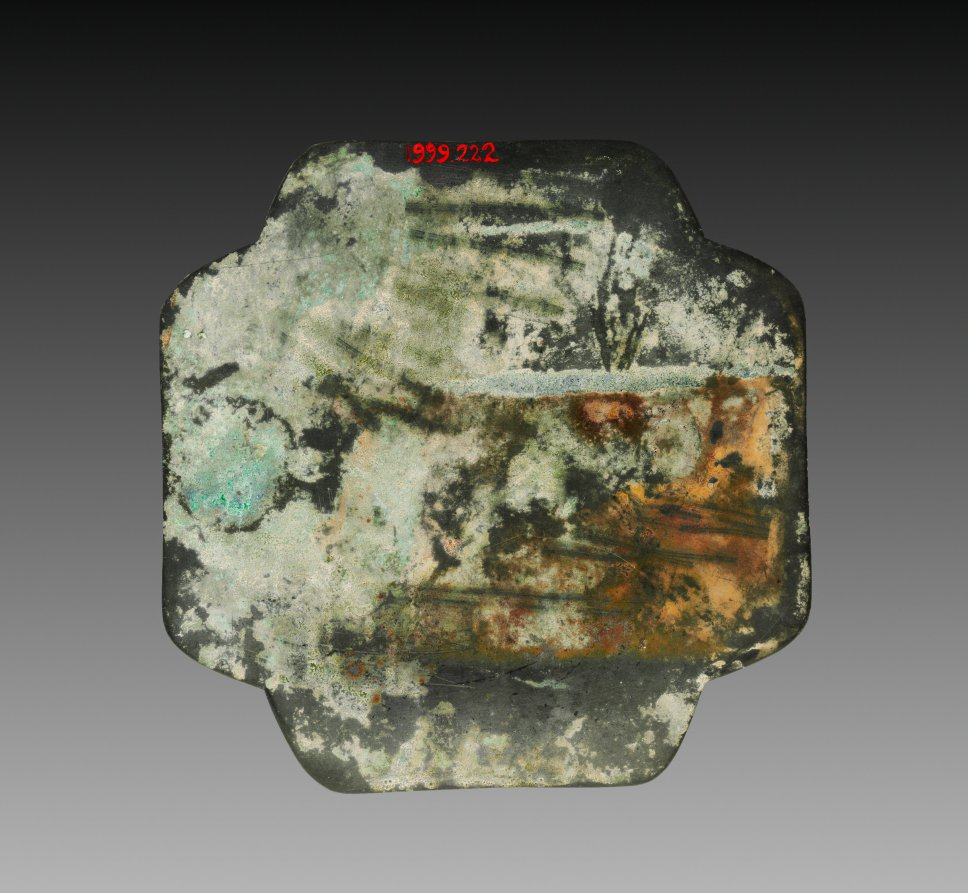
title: Cruciform Mirror with Six Blossoms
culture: China, Northern Song dynasty (960-1127)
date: 960–1127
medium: bronze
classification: Metalwork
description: This cross-shaped mirror has a simple wide frame and a small knob. A part of the floral pattern surrounding the knob has been compromised, likely due to poor casting or damage. The mirror is decorated with designs of flower branches and leaves, which encapsulate six flowers. A few of these branches protrude beyond the beaded circular border to touch the edge of the outer circle, adding a playful dynamism. Similar motifs can be found on silver objects and porcelain of this period.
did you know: Bronze mirrors were made in China from neolithic times until the Qing dynasty, when glass mirrors were brought to China from the West.